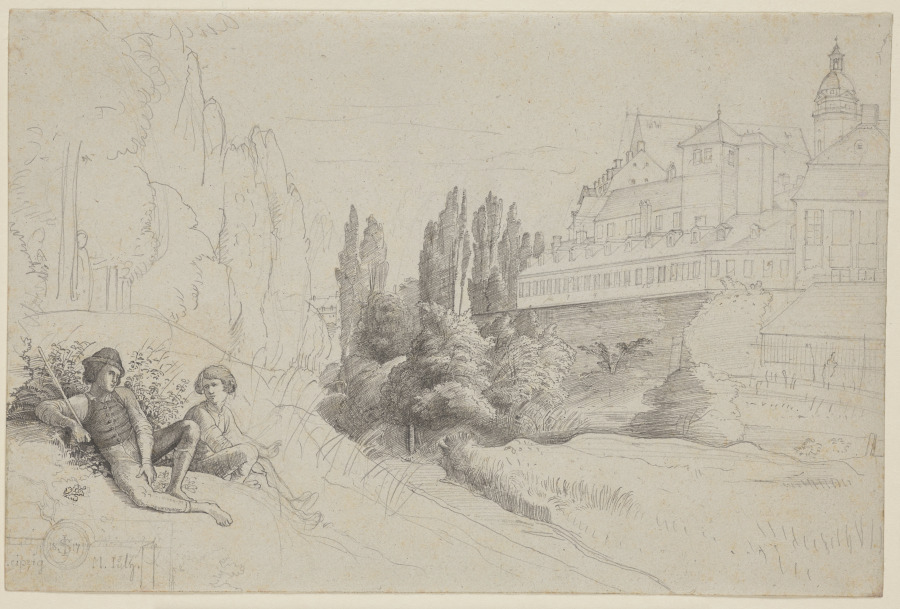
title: View across the Moat towards the Thomasschule and the Thomaskirche in Leipzig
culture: Germany, 19th century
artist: Julius Schnorr von Carolsfeld (German, 1794–1872)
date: 1817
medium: Pen and black ink and graphite on ivory wove paper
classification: Drawing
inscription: Inscribed and dated at lower left: Leipzig 1817 M. July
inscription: stamped at lower right on verso in blue ink: mark of Carl Heumann collection (Lugt 2841a)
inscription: watermark: H * O S E R [unidentified]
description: Julius Schnorr von Carolsfeld belonged to the Nazarenes, a group of artists who looked to early Northern Renaissance art for its simplicity and piety. The artist created this drawing during a visit to his native Leipzig en route to join the Nazarenes in Rome. He depicted the city’s distinctive features, including the oldest German language school in Europe (of which he was an alumnus) and a church where Johann Sebastian Bach served as cantor during the 18th century. The artist himself appears in a self-portrait at right in the pair seen at lower left. He juxtaposed loosely sketched landscape with areas of profuse detail, created with a hard and sharpened pencil reinforced with pen and ink.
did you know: The landscape in this drawing is seen from the perspective of Schnorr von Carolsfeld’s family home in Leipzig.